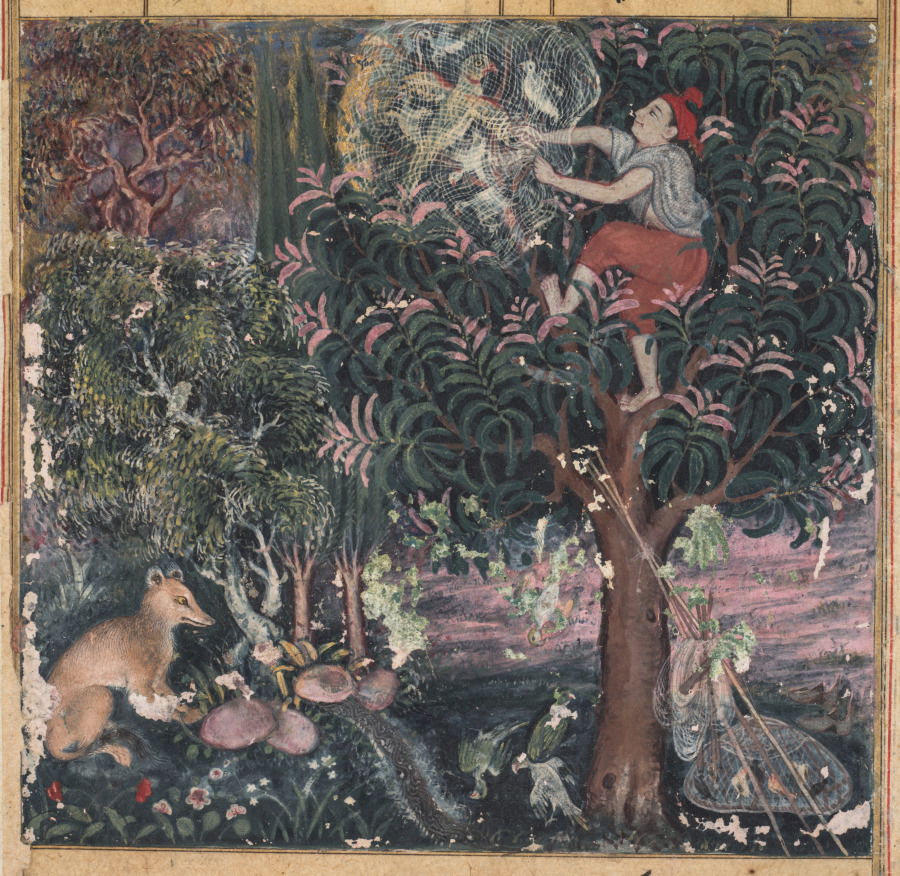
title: The hunter throws away the baby parrots, who pretend to be dead, and captures the mother, from a Tuti-nama (Tales of a Parrot): Fifth Night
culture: Mughal India, court of Akbar (reigned 1556–1605)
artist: attributed to Basavana (Indian, active c. 1560–1600)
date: c. 1560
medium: gum tempera, ink, and gold on paper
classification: Painting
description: Despite the chess-playing monkey’s grim end, the baby parrots continued to cavort with the fox cubs. One day the mother fox discovered that her cubs had been eaten by a panther. Blaming the parrots, she lured a hunter to their tree. The hunter climbed the tree and ensnared the mother parrot and her babies. The mother instructed her young to play dead, then pleaded with the hunter to take her alone, saying that since she knew the art of healing she would fetch a high price. Lush vegetation and a stream of water painted with a soft brush indicate a fresh new stylistic vision that represents a departure from Indian and Persian styles that came before.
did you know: The pink leaves are new shoots that have not yet turned green.